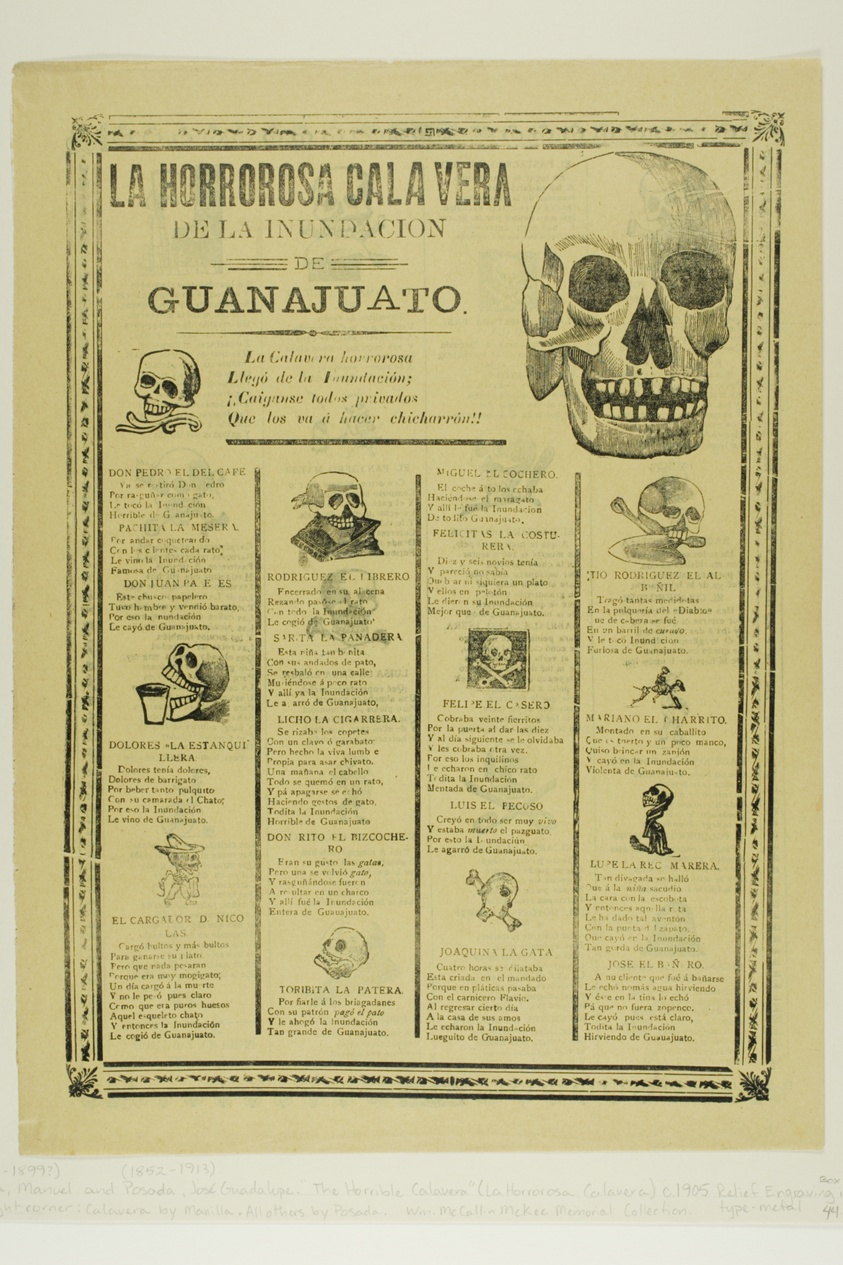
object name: Print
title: The Horrible Calavera of the Flooding of Guanajuato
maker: Manuel Manilla (Mexican, 1830-c.1900); José Guadalupe Posada (Mexican, 1852-1913)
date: 1900/10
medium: Relief engraving on typemetal on paper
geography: Mexico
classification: relief etching; print; prints and drawing